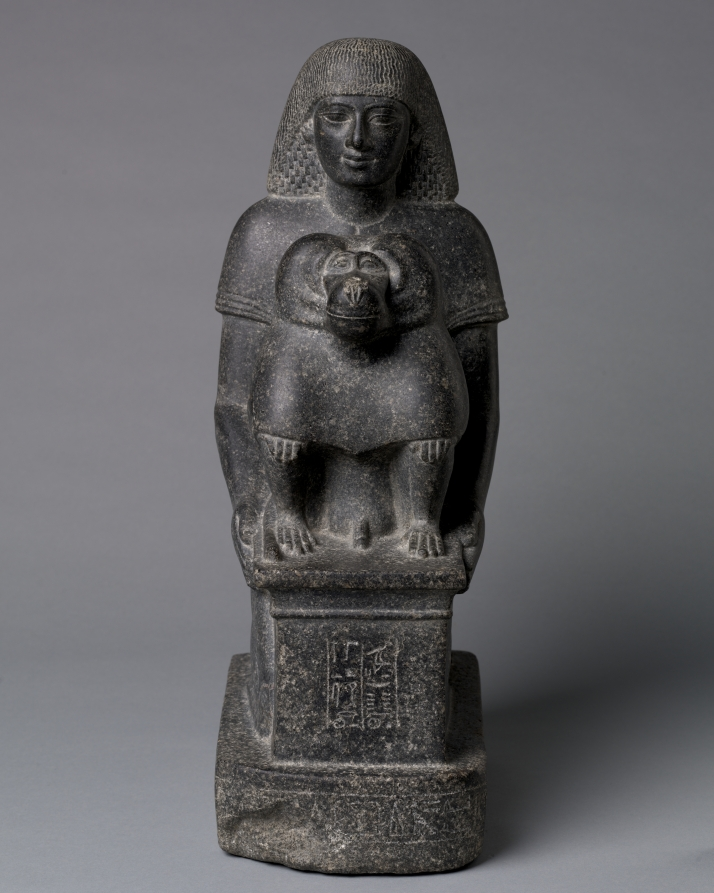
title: Statue of Minemheb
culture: Egypt, New Kingdom (1540–1069 BCE), Dynasty 18, reign of Amenhotep III (1390–1352 BCE)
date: c. 1391–1353 BCE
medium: granodiorite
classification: Sculpture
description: Minemheb was one of the many court officials who helped prepare for Amenhotep III's 30-year jubilee festival. Clearly, Minemheb regarded this as the high point of his career, since his title as chief of construction for the jubilee temple is the primary one provided on this statue. It is actually a statue within a statue: Minemheb kneels to present a small altar, upon which squats a statue of the god Thoth in baboon form. Carved in extremely hard stone, Minemheb's statue is nonetheless carefully detailed and superbly modeled. Special attention was given to the rendering of the baboon's face. The heavy-lidded eyes and furrowed brow give the animal an almost contemplative expression.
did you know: The baboon in this sculpture is the god Thoth in one of his animal forms.